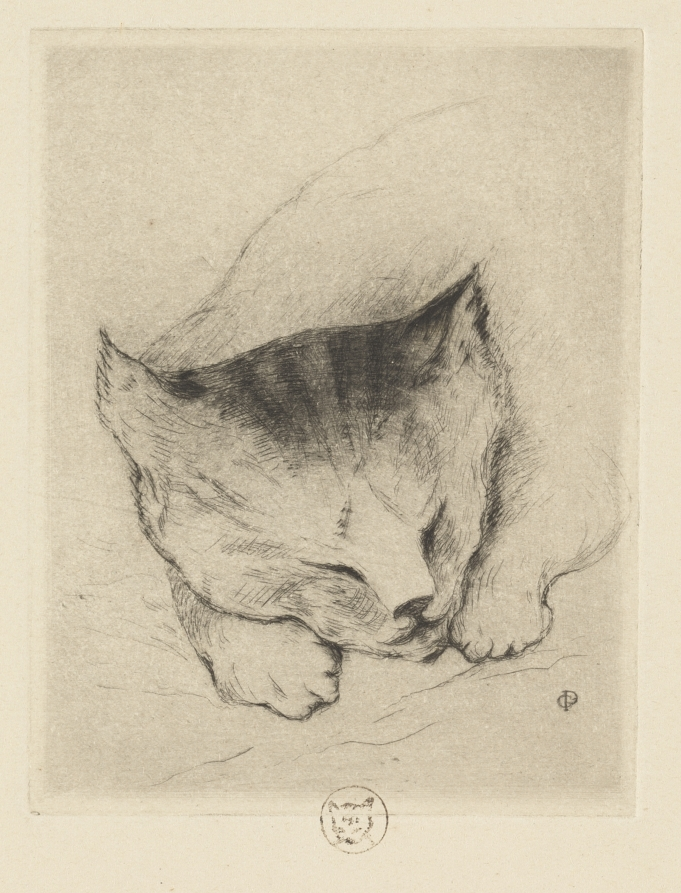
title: Six Etchings: Head of a Kitten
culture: France, 19th century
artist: Paul Gachet (French, 1828–1909)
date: 1895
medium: etching and drypoint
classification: Print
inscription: verso, in ink: Tete de jeune chat